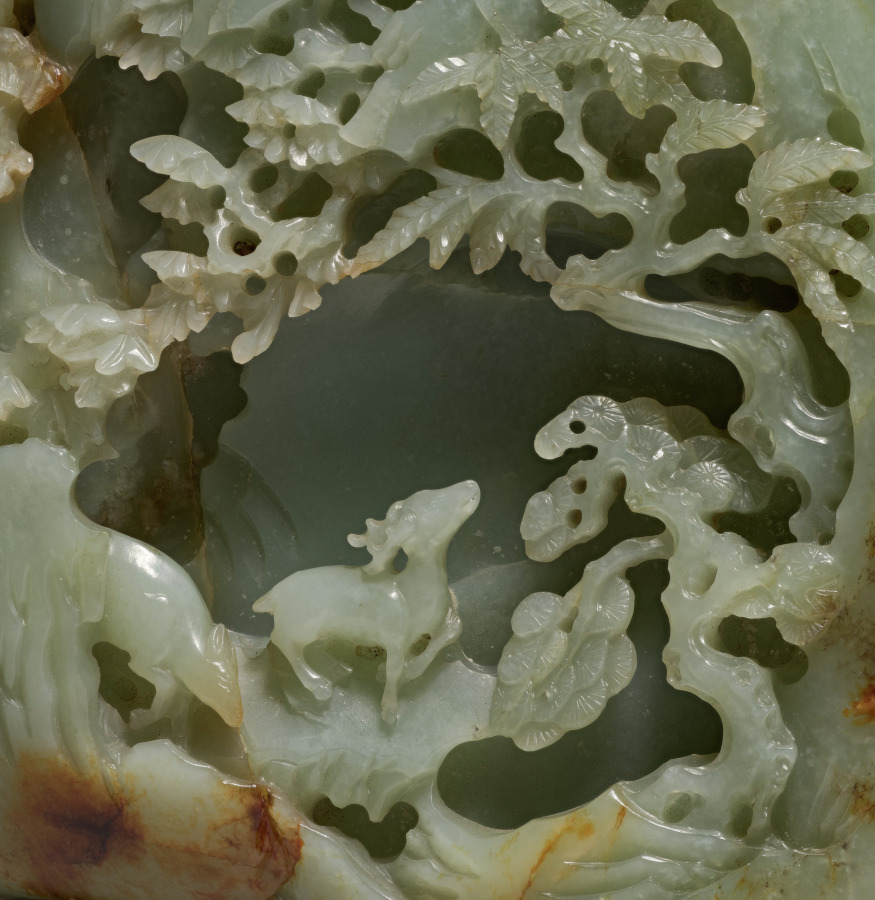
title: Miniature Mountain with Daoist Paradise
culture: China, Qing dynasty (1644–1911), Qianlong reign (1736–95)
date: 1736–95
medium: green jade with brown markings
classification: Jade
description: Sizable jade boulders of mountainous landscapes were carved to represent the search for the paradise or immortals' dwellings in the mountains. This Daoist theme has fired the Chinese imagination throughout history. Believed to have spiritual and magical properties, jade has long been used in tombs and intended for preserving the corporeal body and the soul in the quest for eternity. It is recorded that Daoist practitioners drank morning dews with scraps of jade as an elixir of immortality.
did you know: The bearded immortal is accompanied by a servant carrying a cluster of peaches, symbols of immortality.